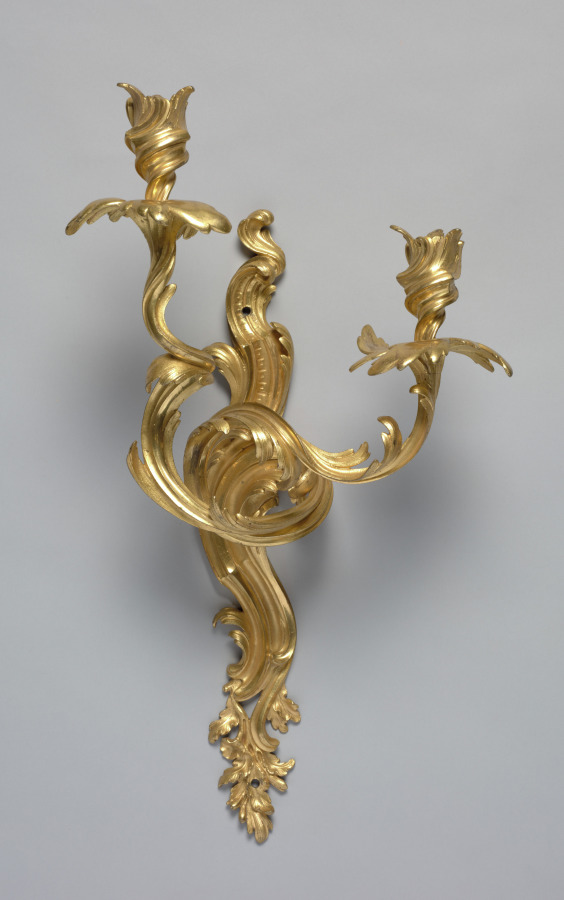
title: Candle Bracket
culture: France, 18th century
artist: attributed to Jean Joseph de Saint-Germain (French, 1720–1791)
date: c. 1750–1760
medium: gilt bronze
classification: Furniture and woodwork